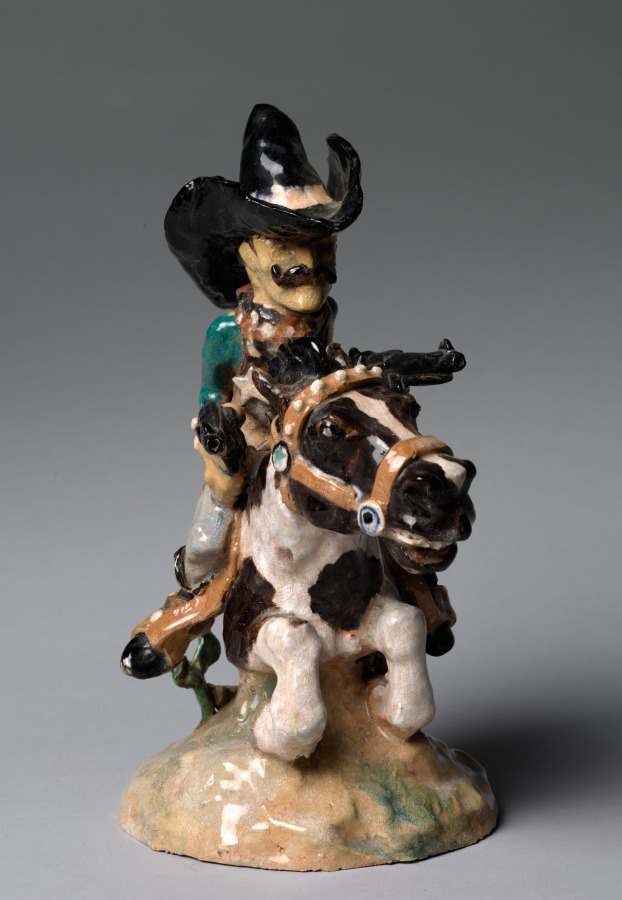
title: Sheriff of Pecos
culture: America, Ohio, Cleveland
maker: Russell Barnett Aitken (American, 1910–2002)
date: 1931–32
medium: ceramic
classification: Ceramic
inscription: Signed on the base on the back side "Russell Aitken"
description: Figural studies were emphasized in ceramics classes at the Kunstgewerbeschule, where Clevelanders Viktor Schreckengost and Russell Barnett Aitken studied in 1929–30. Aitken absorbed the Viennese style of exaggeration and caricature as seen in this depiction of a popular folk hero of the Wild West, incorporating such motifs into his work for the rest of his career.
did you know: Caricature, or the exaggeration of prominent features, was a hallmark of Russell Barnett Aitken's style of modeling figures.